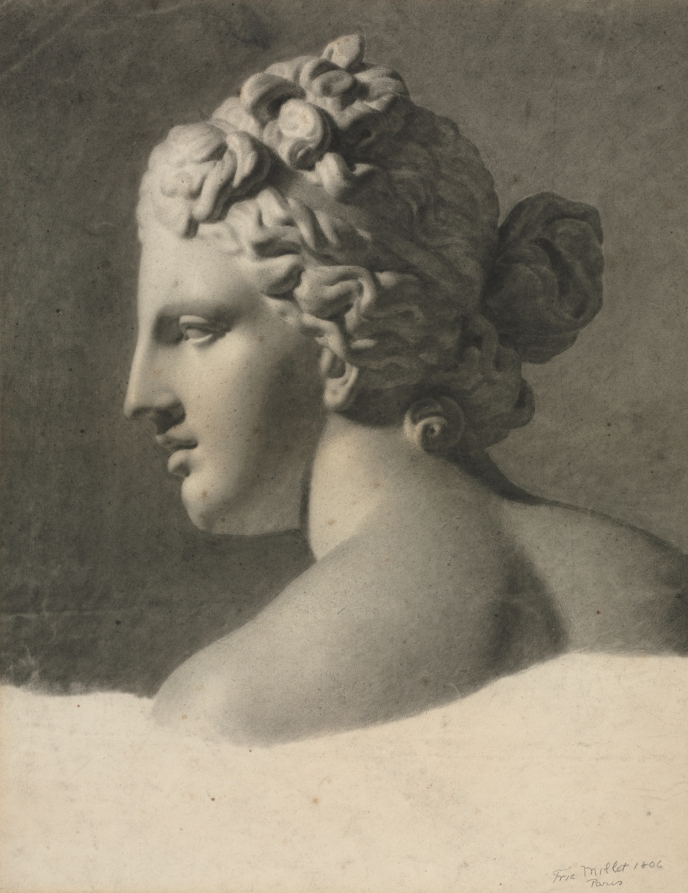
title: Study of a Plaster Cast (a la bosse)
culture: France, 19th century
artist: Frederic Millet (French, 1786–1859)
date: 1806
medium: black chalk with graphite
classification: Drawing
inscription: Signed and dated twice, lower right: Fric Millet 1806 / Paris